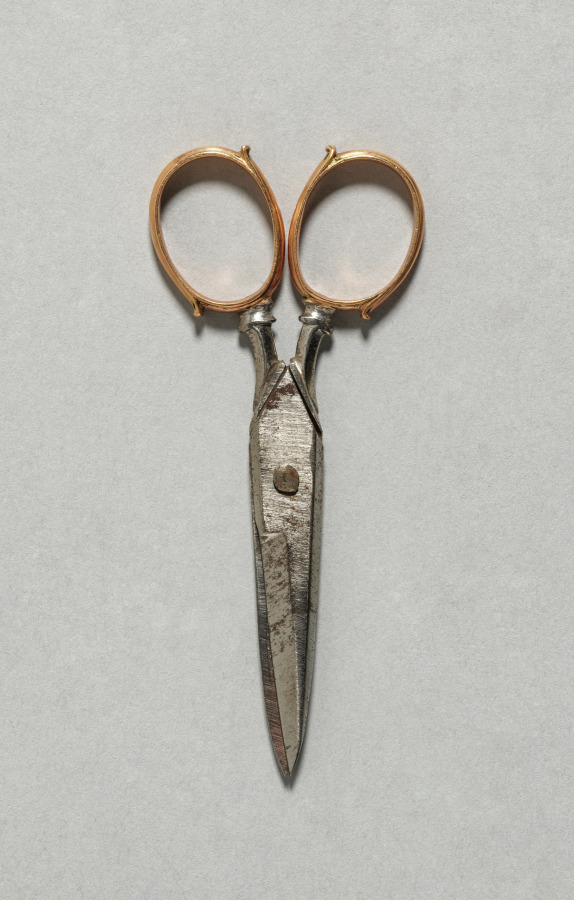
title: Scissors from a Sewing Box (Nécessaire)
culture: Austria, possibly Vienna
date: c. 1765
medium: gold and mother-of-pearl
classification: Miscellaneous